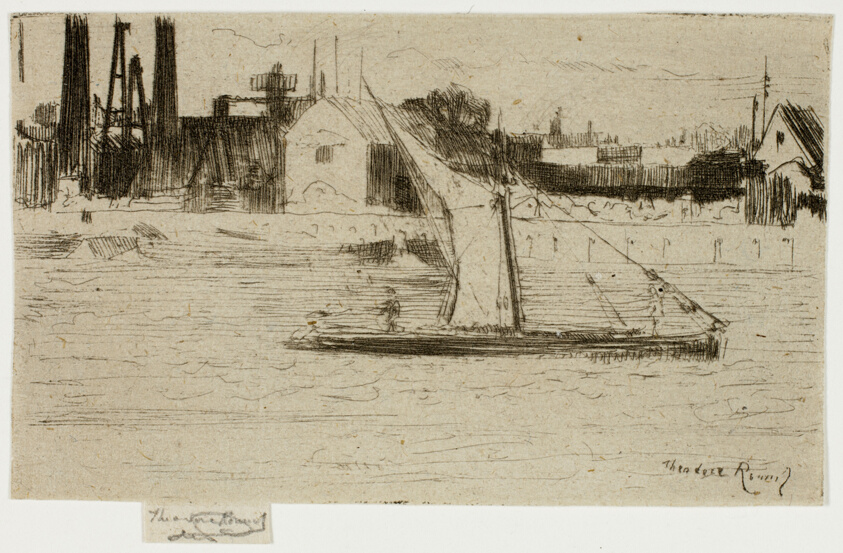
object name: Print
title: The Little Barge, Chelsea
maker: Theodore Roussel (French, worked in England, 1847-1926)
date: 1888–89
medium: Etching in black on cream laid paper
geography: England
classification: etching; paper; print; prints and drawing